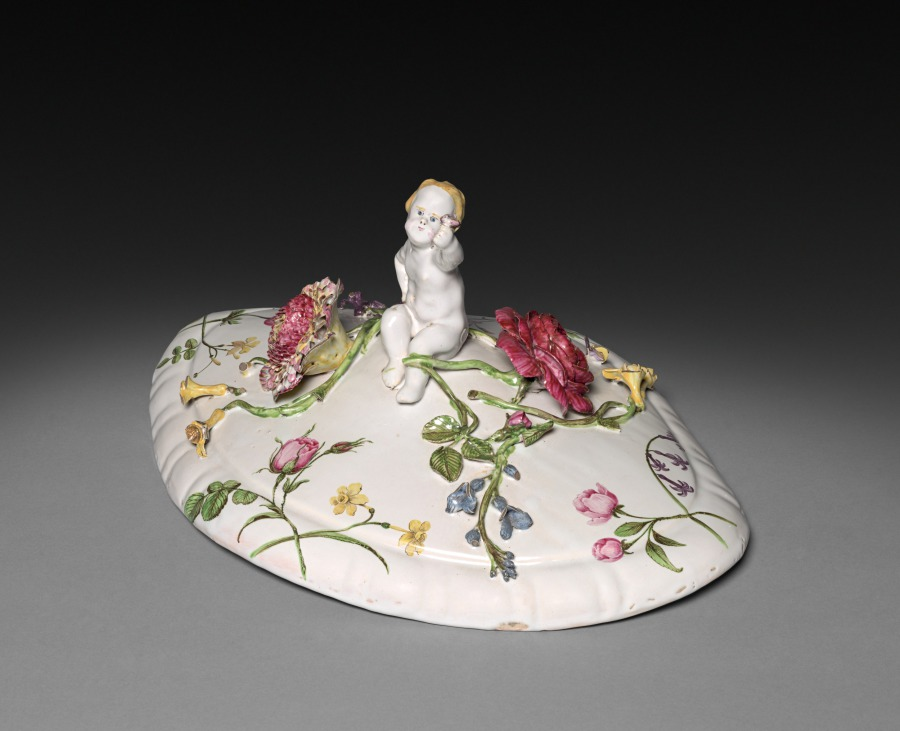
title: Cover for a Tureen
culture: France, Marseilles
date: c. 1760–70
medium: faience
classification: Ceramic